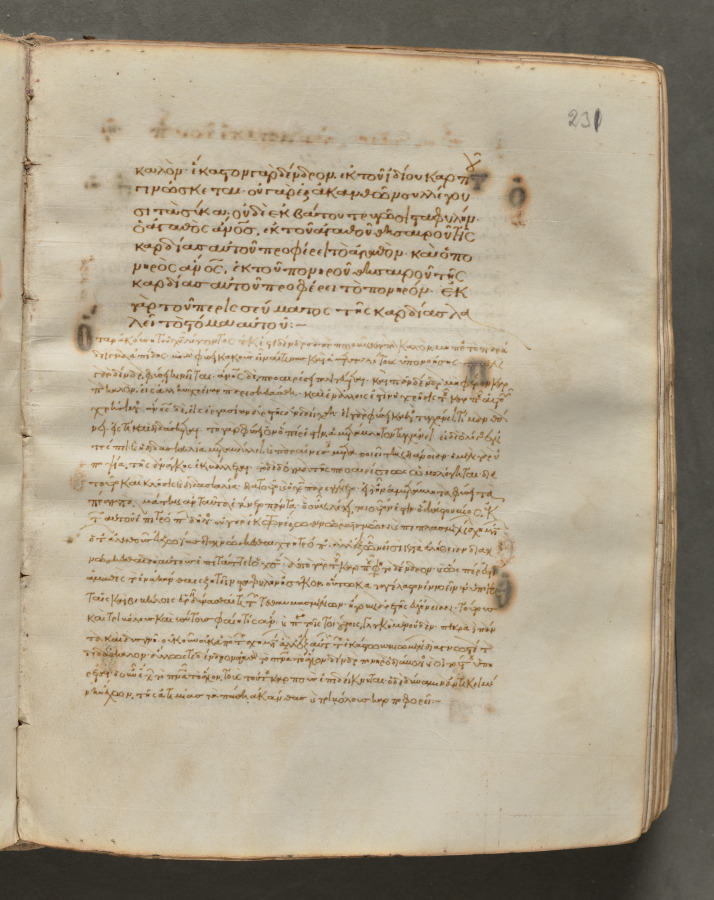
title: Text, folio 231 (recto), from a Gospel Book with Commentaries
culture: Byzantium, Constantinople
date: c. 1000–1100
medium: ink, tempera, and gold on vellum; leather binding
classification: Bound Volume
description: Each of the four gospels in this book opens on a page with brilliantly illuminated borders depicting the author of the text as well as birds—principally peacocks, symbols of the immortality of the soul—and fountains, representing the fountain of life and the salvation of the soul. This volume consists of 428 leaves with texts in Greek. Its level of sophistication suggests that it was probably written and decorated in a monastery in Constantinople.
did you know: Gospel books were carried in procession through Byzantine churches.